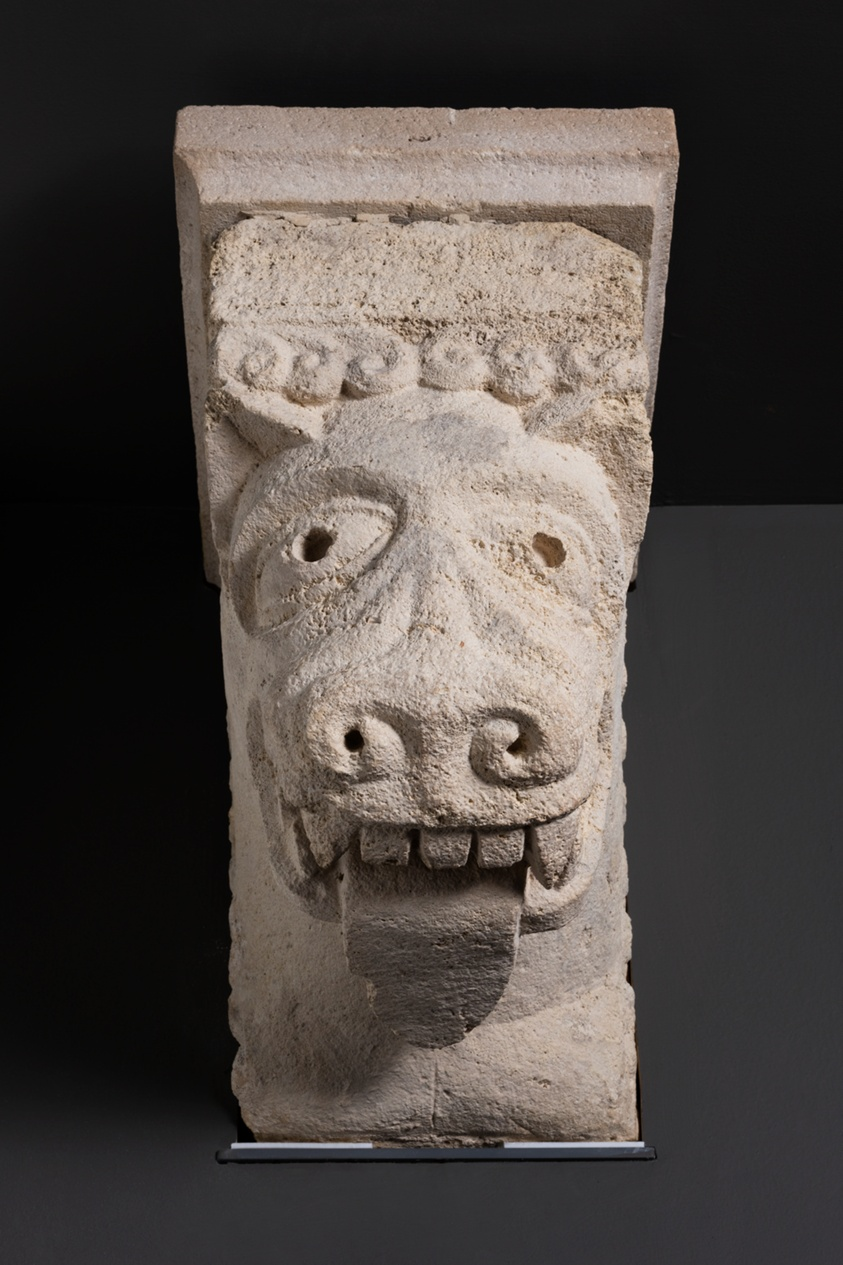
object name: Sculpture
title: Corbel with Animal Mask with Protruding Tongue from the Monastery Church of Notre-Dame-de-la-Grande-Sauve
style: medieval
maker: French; Aquitaine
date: 1150/1200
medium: Limestone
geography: France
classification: sculpture; architectural detail; architectural fragment; architecture; fragment; france; french; limestone; sculpture/stone; stone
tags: corbel, animals, architechture, architectural, architectural detail, architectural fragment, architectural fragments, architecture, architecture, masks